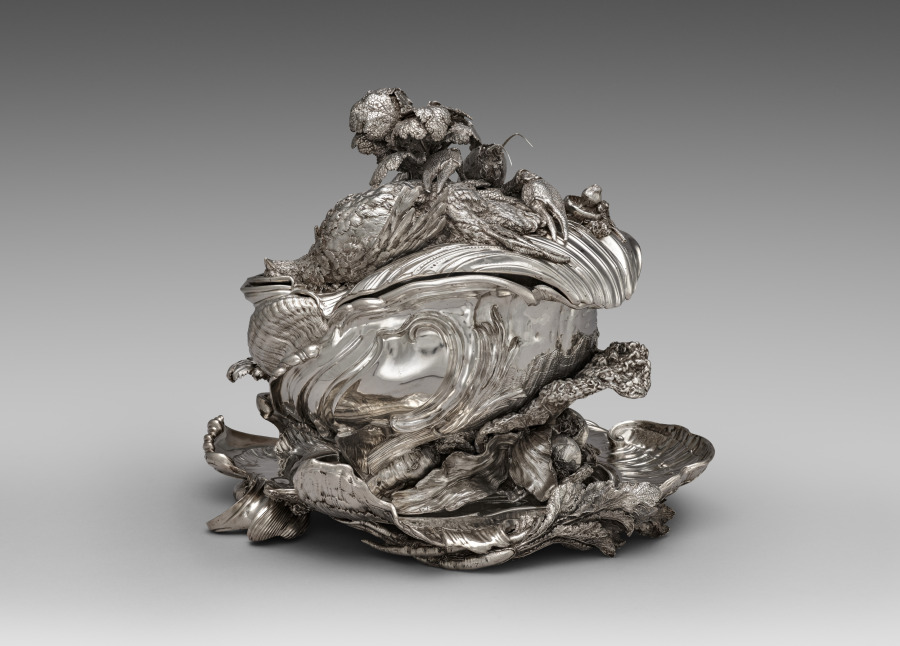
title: Covered Tureen on Stand (Pot-à-oille)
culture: France, Paris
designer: Juste-Aurèle Meissonnier (French, 1695–1750)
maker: Pierre-François Bonnestrenne (French)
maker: Henry Adnet (French, 1745)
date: 1735–38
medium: silver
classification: Silver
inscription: [Maker’s mark of Pierre−François Bonnestrenne, beneath platter; inside tureen (two marks)]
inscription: [Warden's mark for Paris, 1734−1735, beneath platter; inside tureen; inside cover]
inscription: [Charge mark of Hubert Louvet, Paris, 1732-1738, on platter border; beneath platter; beneath tureen; inside cover; inside tureen (two marks)]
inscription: [Discharge mark of Louis Robin mostly used for stamping small work, Paris 1738−1744, on platter border; beneath tureen]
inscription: [Warden's mark for Paris, 1736−1737, on platter border]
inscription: [Possibly British import mark, London, 1925, on platter border]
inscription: [Possibly mark of the British firm Charles & Richard Comyns, on platter border]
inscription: [Discharge of Louis Robin mostly used for stamping gold and silver between 1738 and 1744, beneath tureen; outside cover]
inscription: [Maker’s mark of Henry-Guillaume Adnet, inside cover]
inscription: [Two small undefined marks, inside cover]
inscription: [Under the surface of the platter the engraved signature]: “FAIT-PAR-I-A-MEISSONIER-ARCHITECTTE”; [and the weight] “673=5"; “No. [v] I 50 £ b76Sol”; [and the numbers] “A nº 1”; “A nº2”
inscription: [On tureen lip]: "MEISSONIER"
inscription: [On tureen lip]: “A nº 3”; “A nº2” [in order to place the tureen correctly on the stand]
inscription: [Numbers engraved on the stand, the tureen, and the cover to show how the piece should be assembled]: “A nº 1” [on the base of the tureen; beneath the cover; on the platter], “A nº 2” [on the platter], “A nº 3” [on the exterior rim of the tureen], “A nº4”; “A nº 5” [outside the cover], “A nº 7” [on the border of the platter]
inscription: [Two warden's marks for Paris, 1735-1736, beneath tureen]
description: This tureen exemplifies the French Rococo style, an artistic movement celebrating naturalistic forms that developed in Paris during the early 1700s. In contrast to classical, controlled symmetry, Rococo forms morph, twist, and spill into the space around them. Meissonnier embellished this tureen in a picturesque arrangement of vegetables and creatures, transforming a utilitarian object into a decadent display of wealth and abundance. This masterpiece comes from a set of two tureens commissioned by the English Duke of Kingston during an extended stay in Paris in the 1730s.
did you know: The langoustine, pigeon, and vegetables were cast using real examples giving the silver copies lifelike detail and appearance.